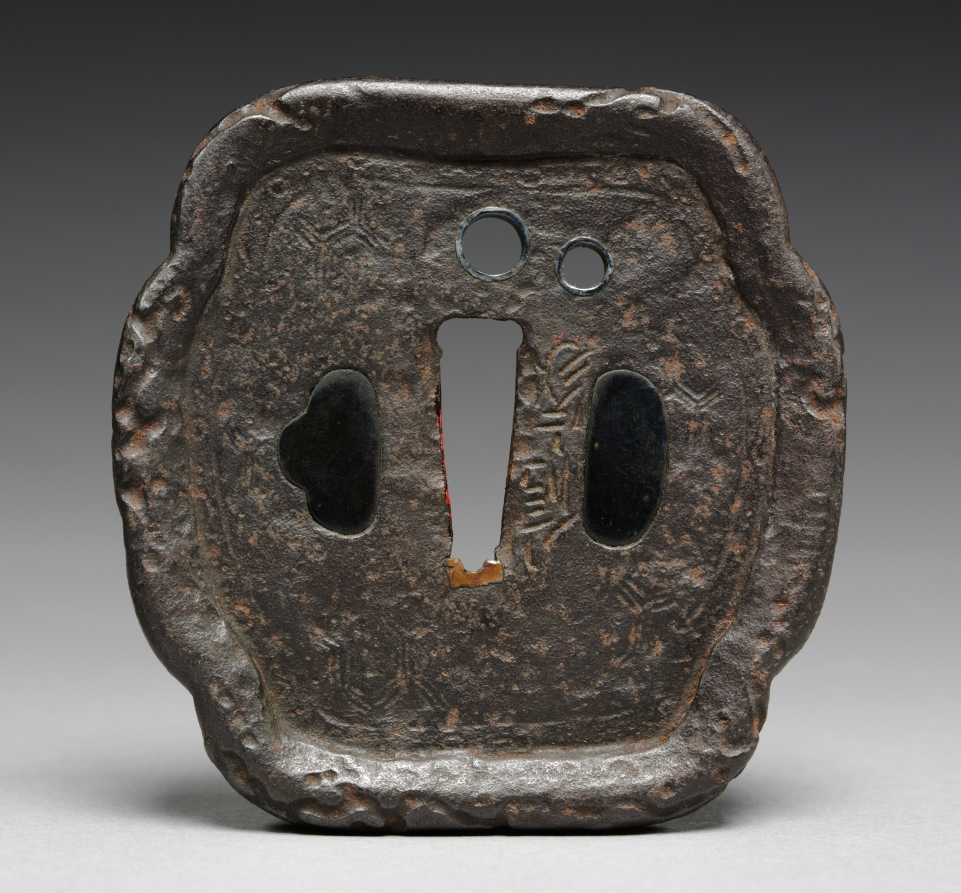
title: Sword Guard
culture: Japan, Muromachi period (1392–1573) to Momoyama period (1573–1615)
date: 1500s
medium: iron (Myochin type)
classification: Arms and Armor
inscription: signed "Nobuiye."